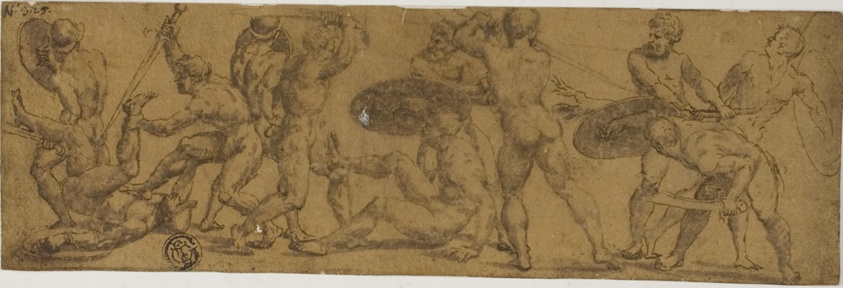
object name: Drawing and Watercolor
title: Nude Warriors Fighting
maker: Unknown Artist; Italian, 18th/19th century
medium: Pen and brown ink, with brush and brown wash, on brown laid paper, laid down on ivory laid paper with blue fibers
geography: Italy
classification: ink or chalk wash; drawings (visual works); prints and drawing